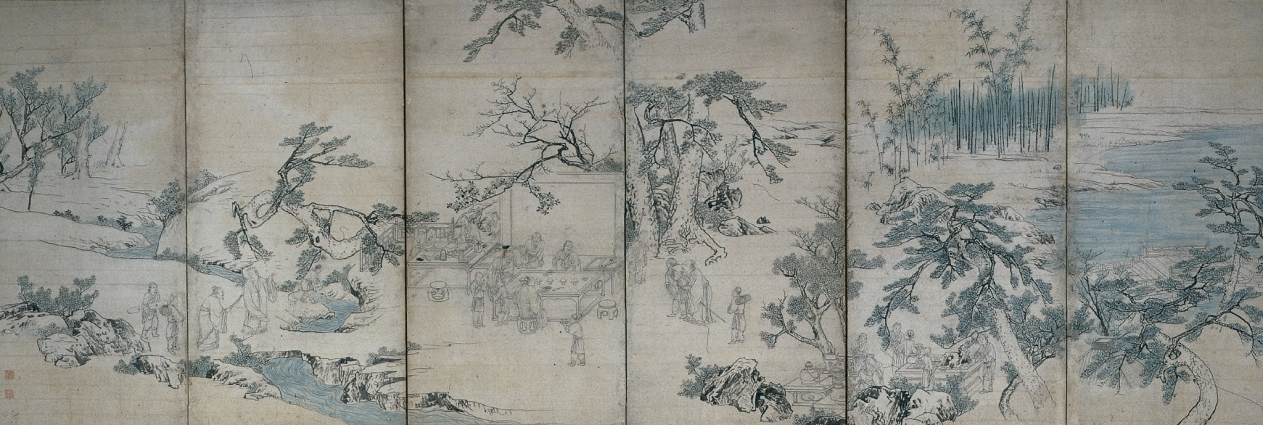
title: Literary Gathering in the Orchid Pavilion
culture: Japan, Edo period (1615–1868)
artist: Maruyama Ōkyo (Japanese, 1733–1795)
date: late 1700s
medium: Six-panel folding screen; ink and slight color on paper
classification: Painting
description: A cheerful gathering of poets was one the most popular themes of East Asian literati paintings. Literary Gathering in the Orchid Pavilion depicts a poets’ party hosted in AD 353 by the famous Chinese calligrapher Wang Xizhi to celebrate the Spring Purification Festival, observed annually on the third day of the third month. Wang invited 41 scholar-poets to compose poetry and drink while seated along the bank of a winding rivulet. This screen would have appeared on the left and shows preparations for the gathering. The lost right screen is assumed to have depicted the poets sitting along the stream.